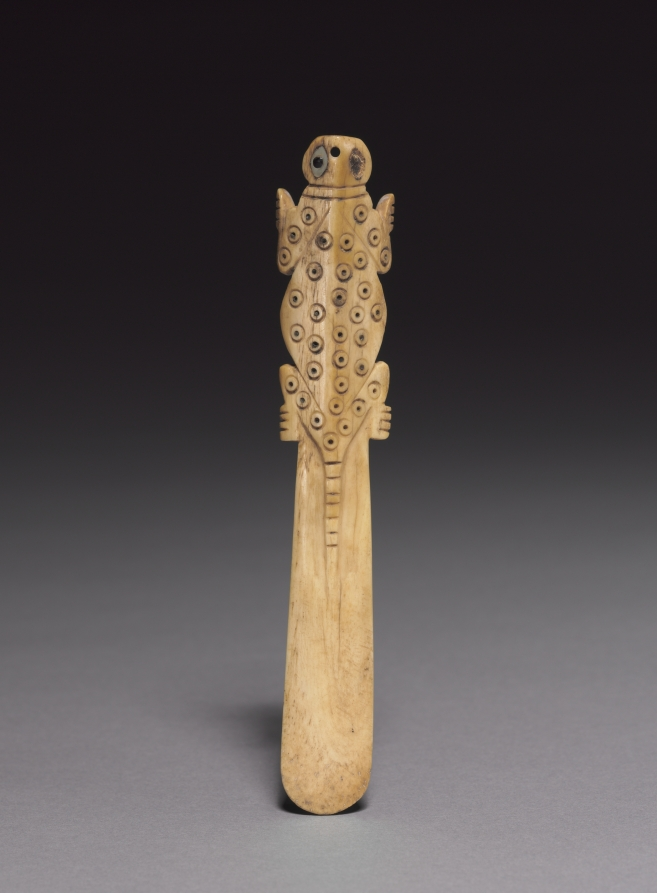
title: Spatula with Carved Lizard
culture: Peru, South Coast, Nasca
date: 100 BCE–700 CE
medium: bone with shell inlay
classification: Sculpture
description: Peruvian Indians today regard coca leaf as a sacred substance that creates communion with supernatural forces. The leaves are chewed with powdered lime that in antiquity was stored in containers and scooped with spatulas like those seen here. Aside from its ritual meaning, coca has practical benefits: it is vitamin-rich; like coffee, it induces clear-headedness; and it increases stamina. The lizard spatula is Nasca in style.